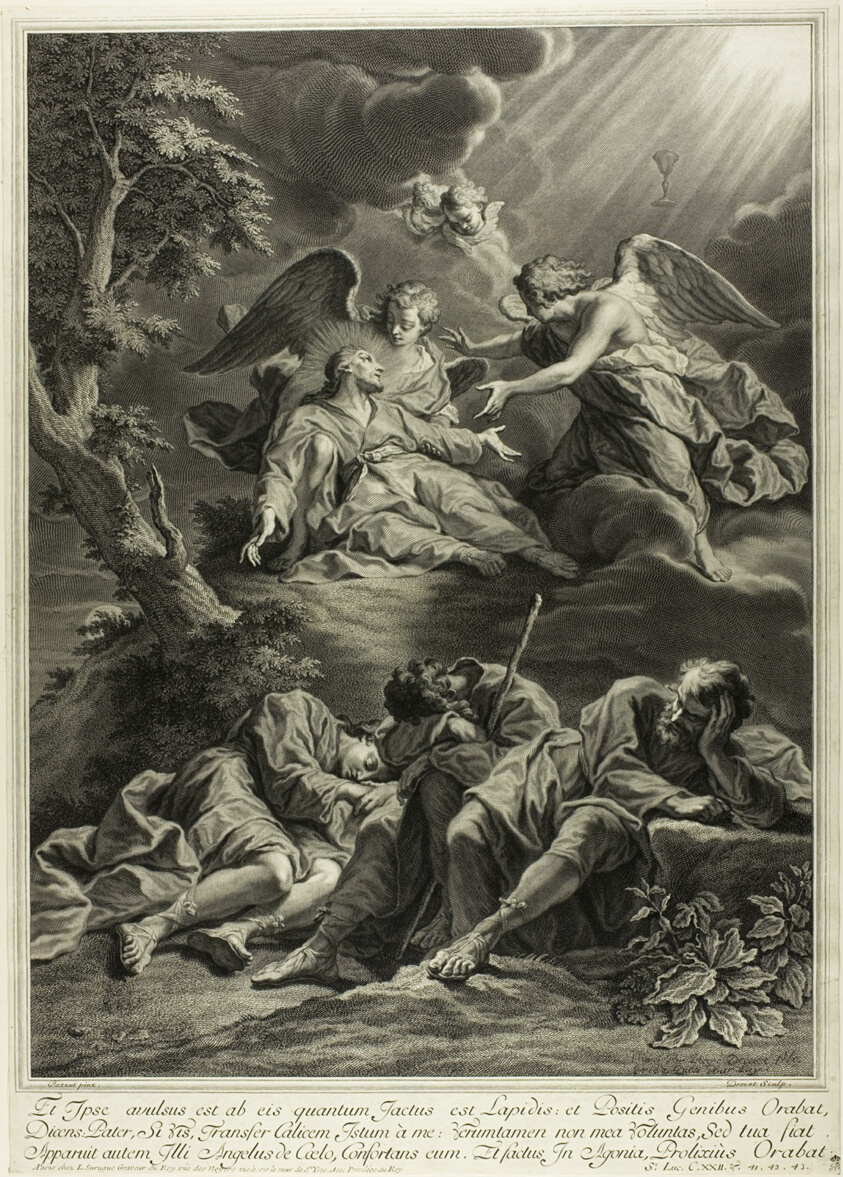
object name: Print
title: Christ at Gethsemane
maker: Pierre-Imbert Drevet (French, 1697-1739); after Jean Restout the Younger (French, 1692-1768)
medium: Engraving with etching on ivory laid paper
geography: France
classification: engraving; print; prints and drawing